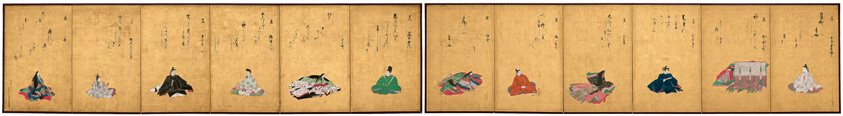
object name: Painting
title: Twelve Poetic Immortals and Their Poems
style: Japanese (culture or style)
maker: Reizei Tamechika; Japanese, 1823-1864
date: 1850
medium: Pair of six-panel screens; ink, colors, and gold on paper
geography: Japan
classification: screen; painting; asian art